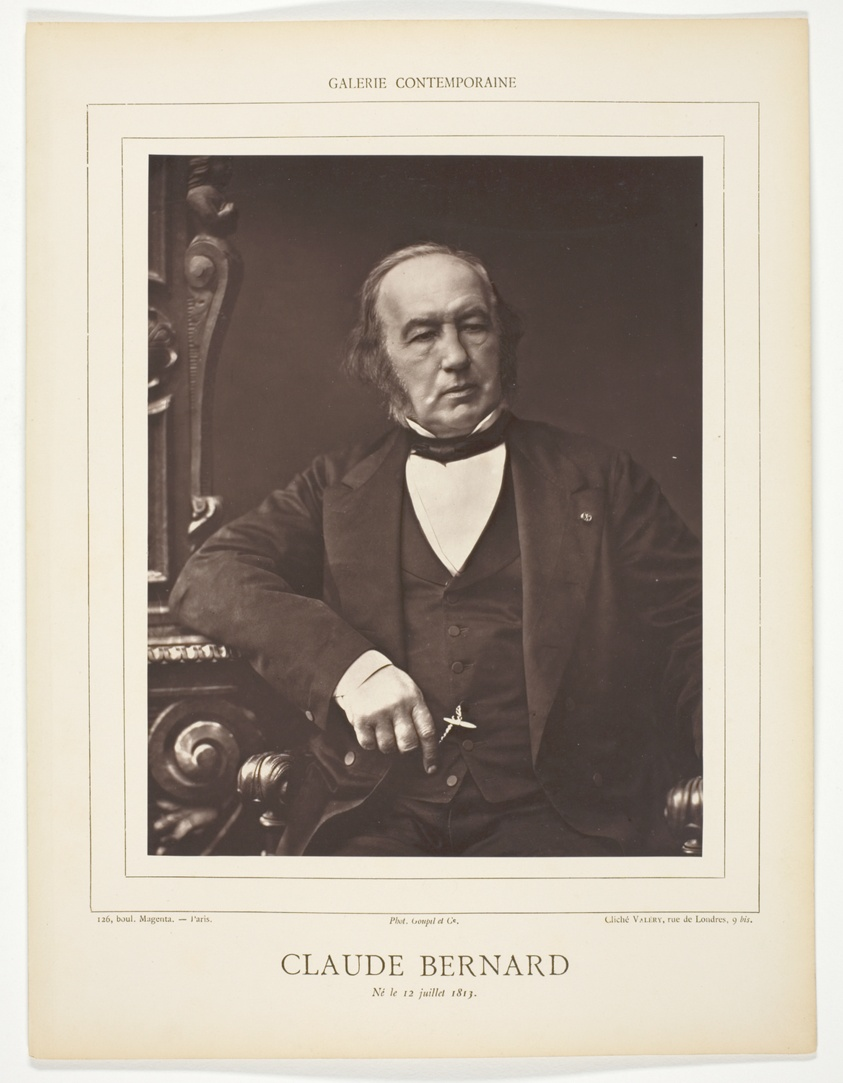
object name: Photograph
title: Claude Bernard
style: 19th century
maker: Valery (French, 19th century)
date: c. 1876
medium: Woodburytype, from the periodical “Galerie Contemporaine Littéraire, Artistique” (1877), volume 4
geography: France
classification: woodburytype; photomechanical process; photography; photograph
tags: Collected by Hugh Edwards, Contemporaine Littéraire